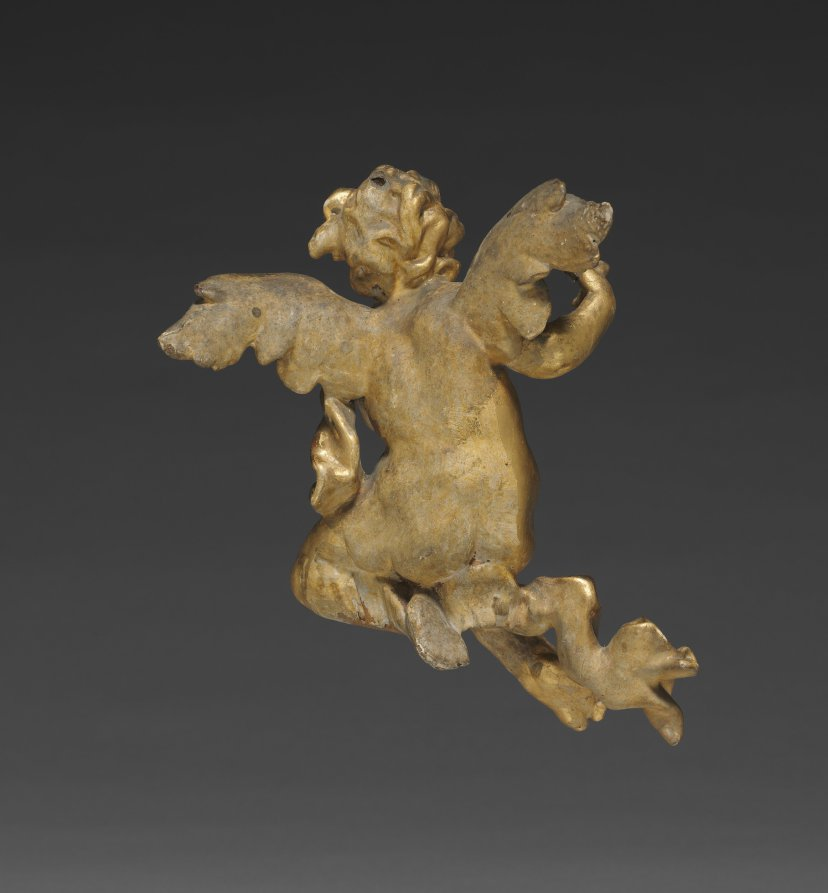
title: Altarpiece with Relics - Putto, middle left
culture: Germany, Bavaria, 18th century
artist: Joseph Matthias Götz (German, 1696–1760)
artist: and Workshop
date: c. 1735–1740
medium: gilded wood, with relics in niches: gilded wood, mother-of-pearl, ebony, red silk, gold wire, seed pearls, rock crystal, pen and ink on paper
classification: Sculpture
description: Götz covers every surface in gold leaf, giving each part of the object equal importance, rather than simply framing a central picture. In this distinctively Central European approach, figural narrative is subordinate to the overall ensemble. Götz designed this object to rest on top of an altar, probably in front of a larger painted or sculpted decorative scheme. The work contains relics seen through the small windows on the perimeter. These small remains of holy figures demonstrate the persistence of a medieval Catholic tradition well into the 1700s.